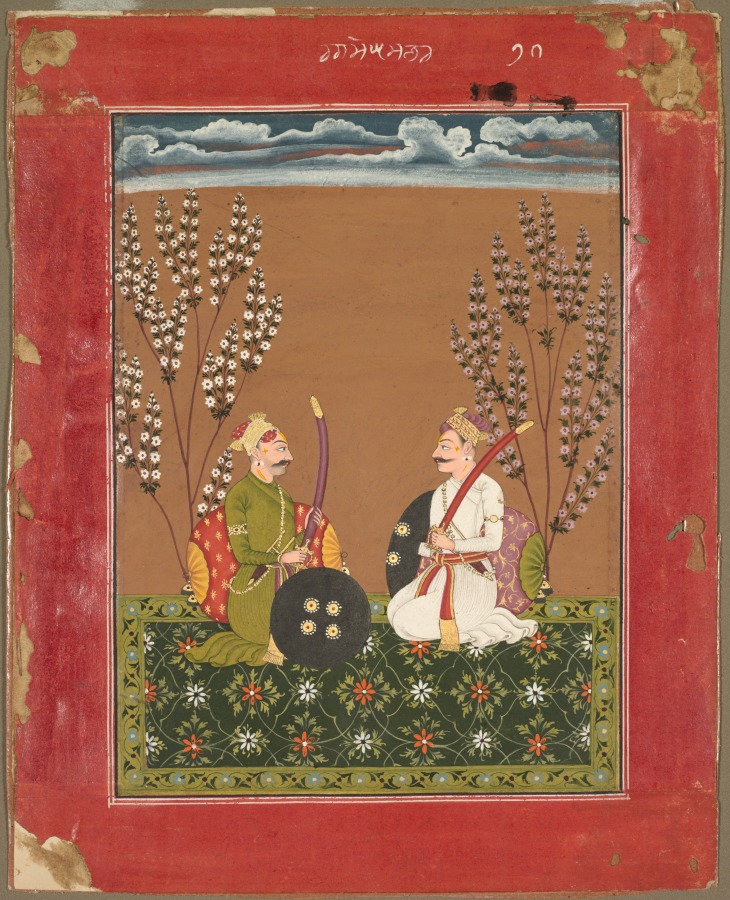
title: Surmananda Ragaputra of Hindol, from a Ragamala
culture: Northern India, Pahari kingdoms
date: c. 1750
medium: Gum tempera, ink, and gold on paper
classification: Painting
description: Most paintings of this scene show two warriors in active swordplay combat. Here the two warriors hold their swords and shields, probably in the moments before their competition begins.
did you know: The vertical yellow marks on their foreheads reveal that they are followers of the Hindu god Vishnu.